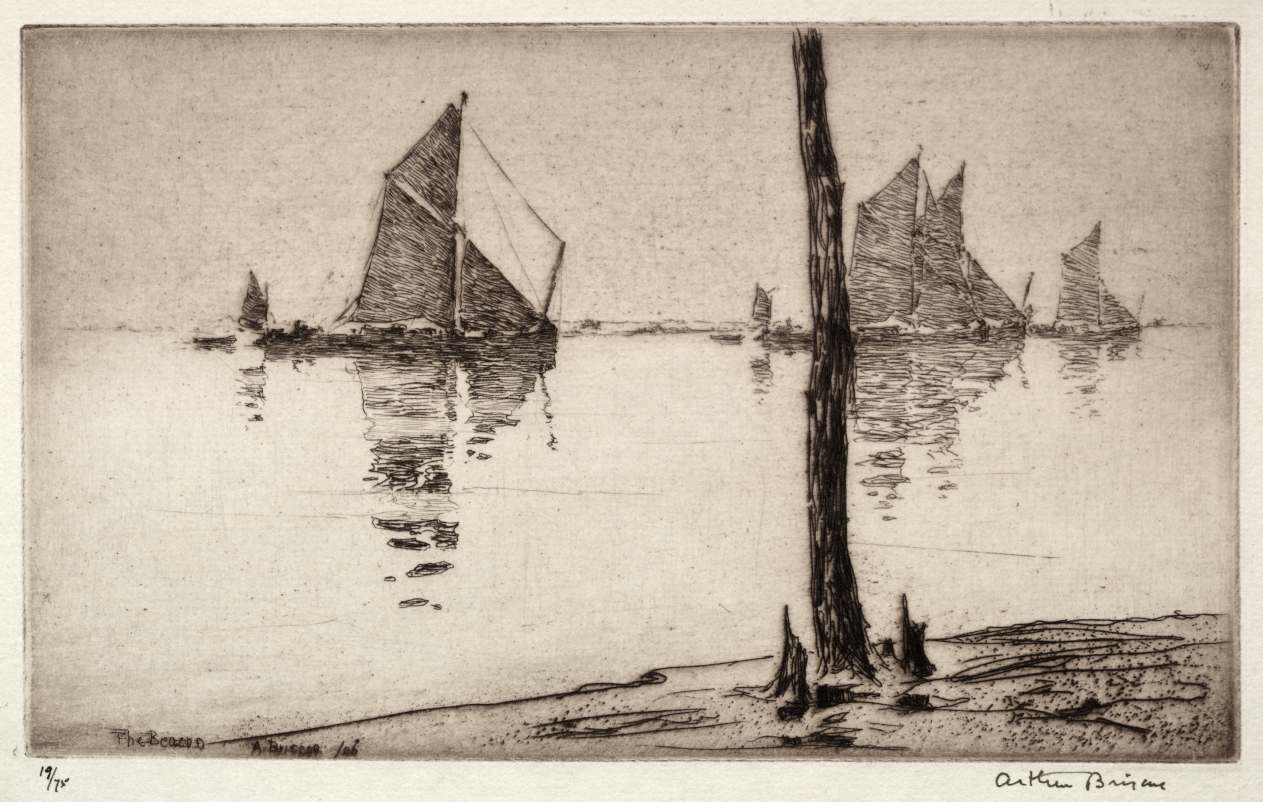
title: The Beacon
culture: England, 20th century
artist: Arthur John Trevor Briscoe (British, 1873–1943)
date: 1925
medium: etching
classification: Print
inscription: Lower margin, in ink: 19/75 Arthur Briscoe